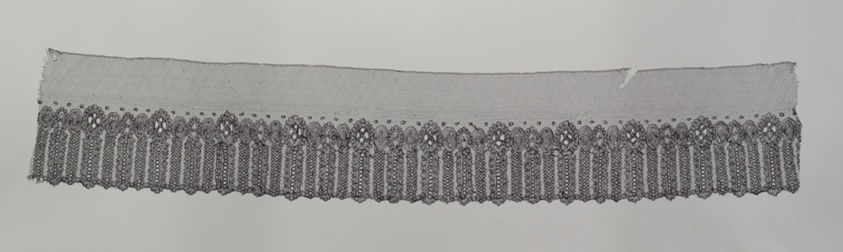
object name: Textile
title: Border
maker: Belgium or France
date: 1860s/70s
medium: Silk, bobbin straight lace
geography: Western Europe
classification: textile; lace - bobbin